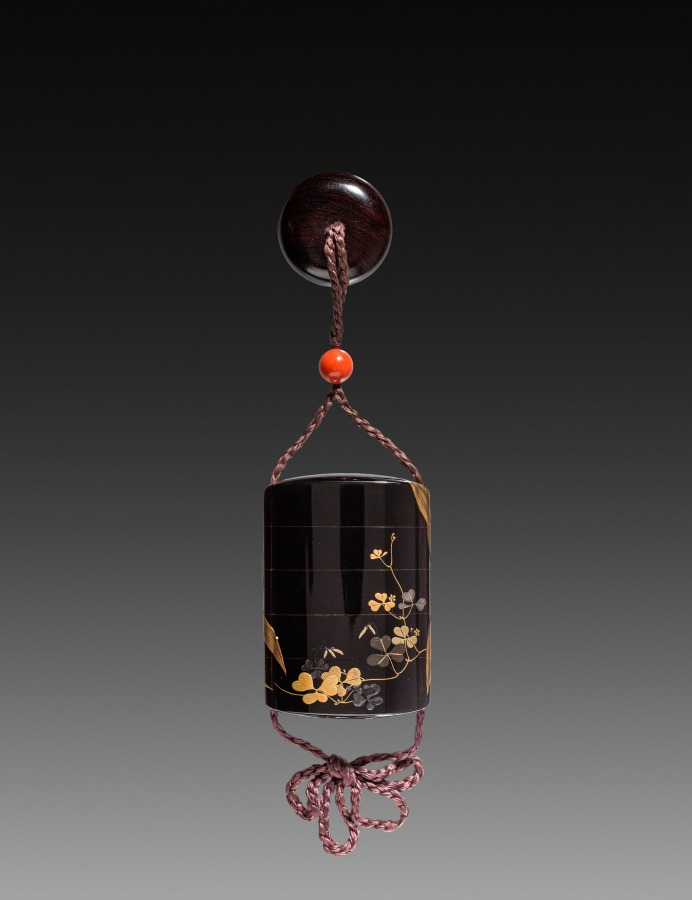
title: Inro, Ojime, Netsuke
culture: Japan, Edo period (1615–1868) to Meiji period (1868–1912)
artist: Shibata Zeshin (Japanese, 1807–1891)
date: later 1800s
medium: lacquer with sprinkled gold, silver, and mother-of-pearl design, coral, and wood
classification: Lacquer